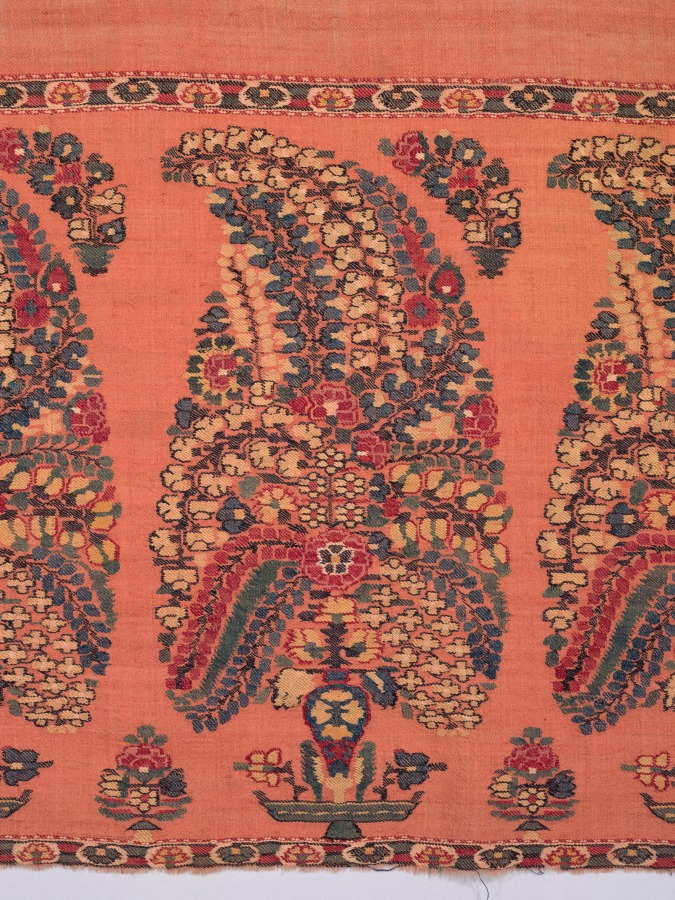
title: Apricot Long Shawl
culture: India, Kashmir, Afghan period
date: 1785–1800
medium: 2/2 twill tapestry weave, double interlocked; wool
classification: Textile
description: Artistic styles evolved with increasingly elaborate mosaic-like decoration during the 1800s to meet an insatiable European demand. Early shawls had plain fields with isolated plants in the end panels, which led to decorated side borders and vases of blossoming stems. Such flora was replaced by colorful, dense blossoms forming cone-shaped botehs, or paisleys, on trays. To this was added a gallery of small botehs and angular floral vines around a rich blue field with single botehs in the corners. Lightweight, supple, warm, and colorful, Kashmir shawls had no equal. Fine, soft goat-hair wool was woven in a 2/2 twill tapestry weave—the equivalent of painting with colored weft threads. Imitations woven in Paisley, Scotland, prompted the popular term paisley.